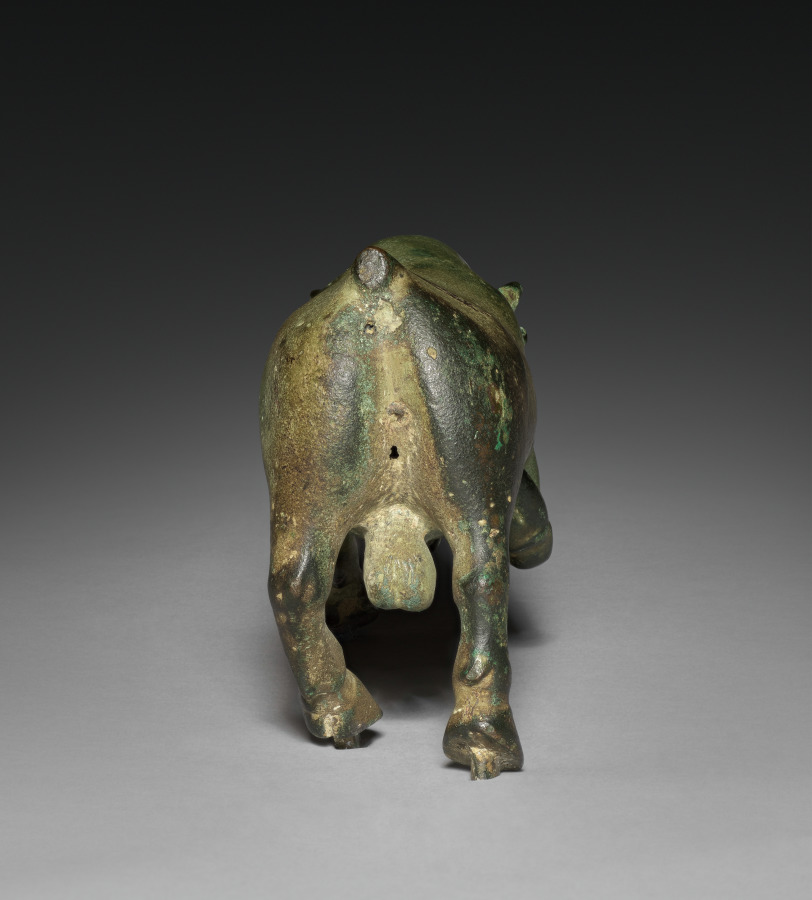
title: Pawing Bull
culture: South Italy, Lucania, Greek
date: 500–475 BCE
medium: bronze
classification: Sculpture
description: With its head slightly lowered and right foreleg raised in a pawing motion, this robust bull seems poised for action. The pose closely resembles that of bulls on coins minted at Thurii, a Greek colony in South Italy, but the statuette seems earlier in date and could have other associations. Perhaps the bull once carried the princess Europa, for example, or battled a lion or a hero. Alternatively, it may have stood alone as a small-scale offering, representing the actual bulls sometimes sacrificed to deities.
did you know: This solid-cast bronze bull is nearly intact, missing only its tail.